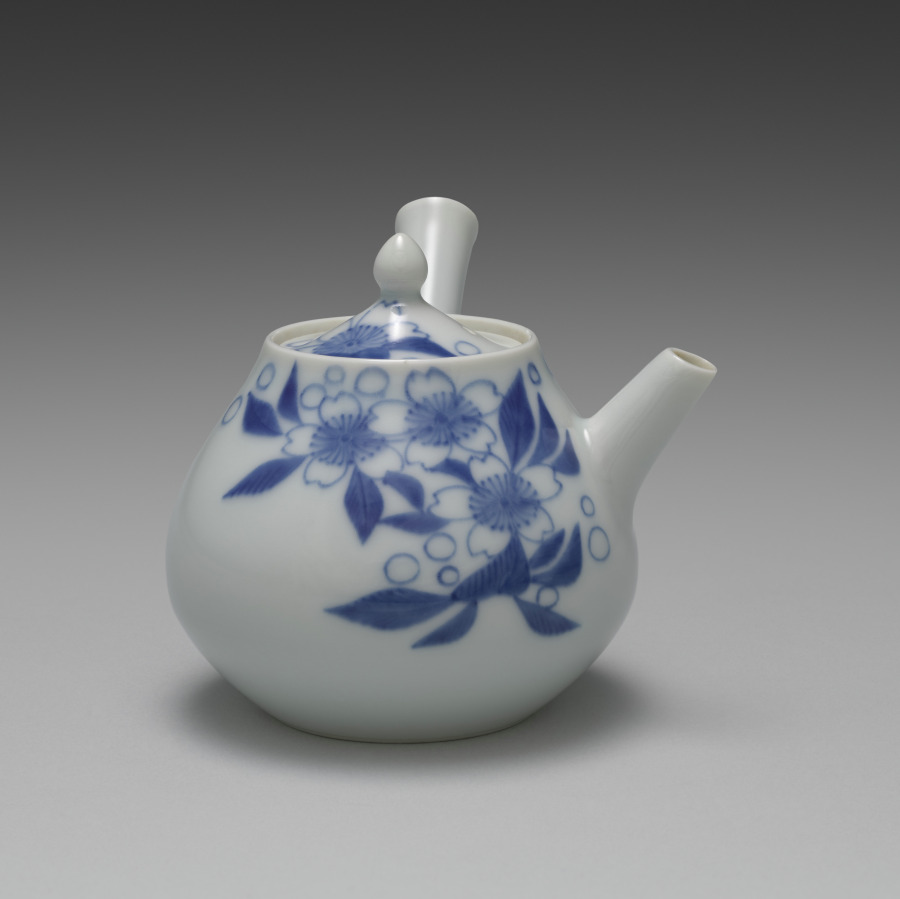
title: Teapot with Cherry Blossoms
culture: Japan, Taishō period (1912–26) or Shōwa period (1926–89)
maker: Seifū Yohei IV (Japanese, 1872–1951)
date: 1914–46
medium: Porcelain with underglaze blue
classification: Ceramic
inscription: 清風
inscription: 清風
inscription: 清風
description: This teapot with mountain cherry blossom motifs has its design in underglaze cobalt blue. It runs over both the pear-shaped body and the recessed lid, with its pointed, jewel-shaped handle. There is a faint bluish-green tint to the glaze. The mark impressed into the base of this work appears to be one used by Yohei III. However, the box inscription is brushed in a hand matching that of Yohei IV, and while the seal on the lid is one often used by Yohei III, that next to the signature on the back of the lid is one generally used by Yohei IV. The signature, too, resembles others belonging to Yohei IV. As the design, technique, and object named on the box accurately describe the contents, it seems unlikely, but not impossible, that it is mismatched. There are many cases in which Yohei III works are contained in boxes with inscriptions, seals, and a signature by Yohei IV. However, in such examples, Yohei IV clearly identifies himself as authenticating the work of his father and often includes his father’s Imperial Household Artist seal. This may be an example of a transitional piece in which Yohei IV has used his father’s mark on the base of his own work.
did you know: Cherry blossoms mark the arrival of spring, and their short-lived beauty is deeply anticipated and appreciated.